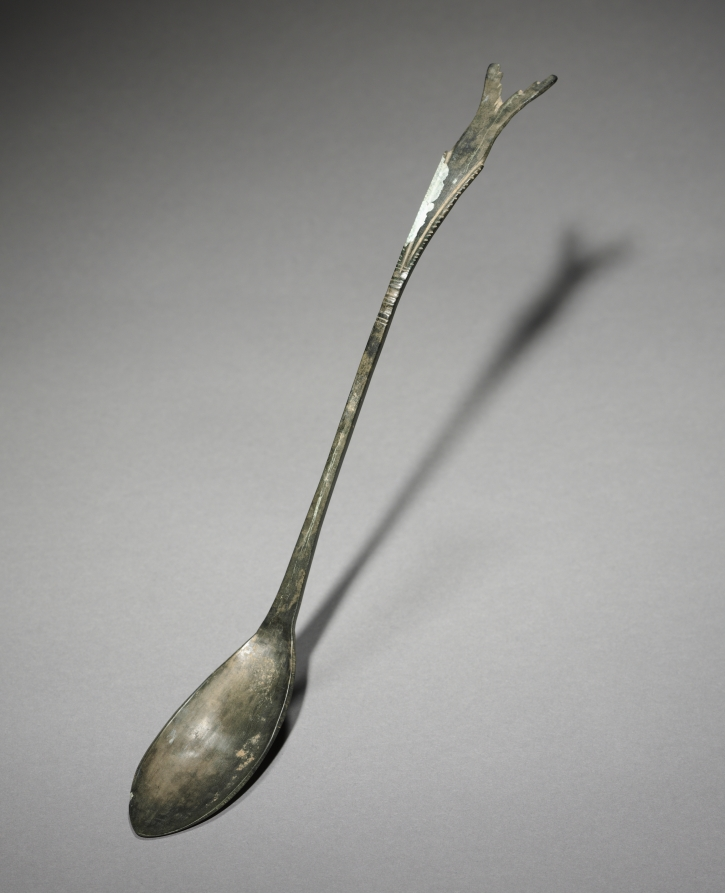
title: Spoon with Fish-Tail Design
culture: Korea, Goryeo dynasty (918–1392)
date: 918–1392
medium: bronze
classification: Metalwork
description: Many of Goryeo period spoons like this one feature a curved handle that splits into a jagged fishtail design. This fishtail design is not unique to Korea; it was also widely used in the area under the rule of two non-Han Chinese states: Liao (907–1125) and Jin (1115–1234). These seemingly ordinary objects testify to exciting material interactions between the Goryeo dynasty and non-Han Chinese northern states, which were often omitted from the official records.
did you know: Bronze spoons are the most common burial item. Scholars have proposed that toward the end of the 14th century, Koreans enjoyed meat-based soups more than any other dishes, explaining why spoons became common household items as well as burial goods.